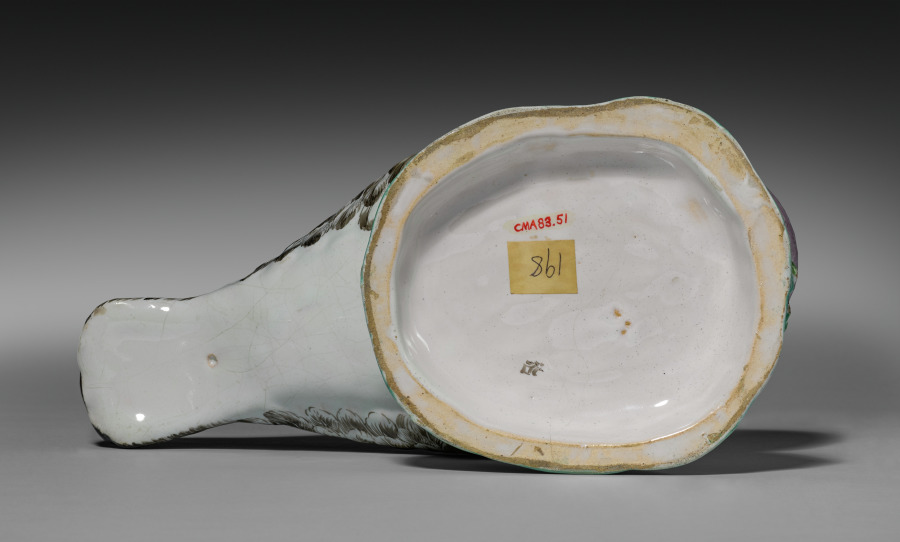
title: Tureen in the Form of a Pigeon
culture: France, 18th century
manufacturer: Sceaux Factory (French, active 1748–66)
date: c. 1760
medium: Tin- glazed earthenware (faience) wth enamel decoration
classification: Ceramic